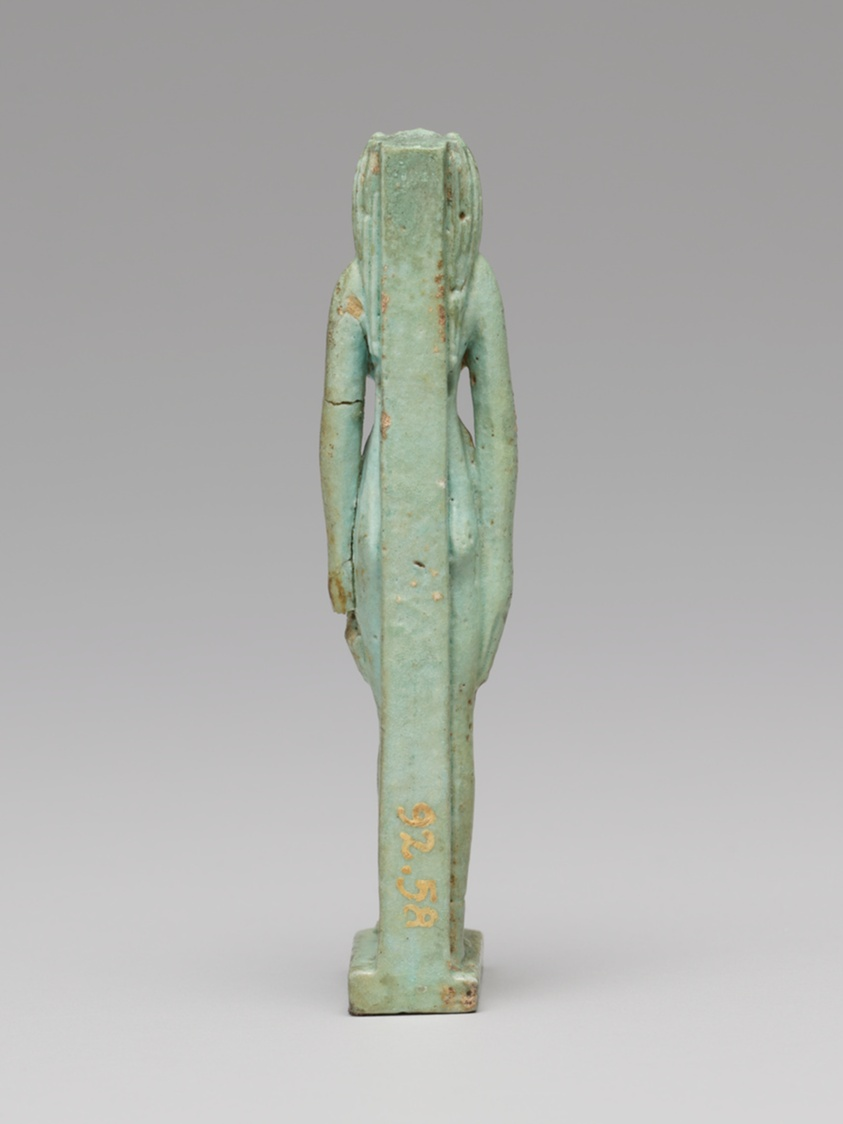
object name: Costume and Accessories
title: Amulet of Sekhmet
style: third intermediate period, egyptian, ancient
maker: Egyptian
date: Third Intermediate Period (about 1069–664 BCE)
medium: Faience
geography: Egypt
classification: amulet; jewelry; ceramics; ancient art; costume; faïence (composite material)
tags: goddesses, animals, lions, cats